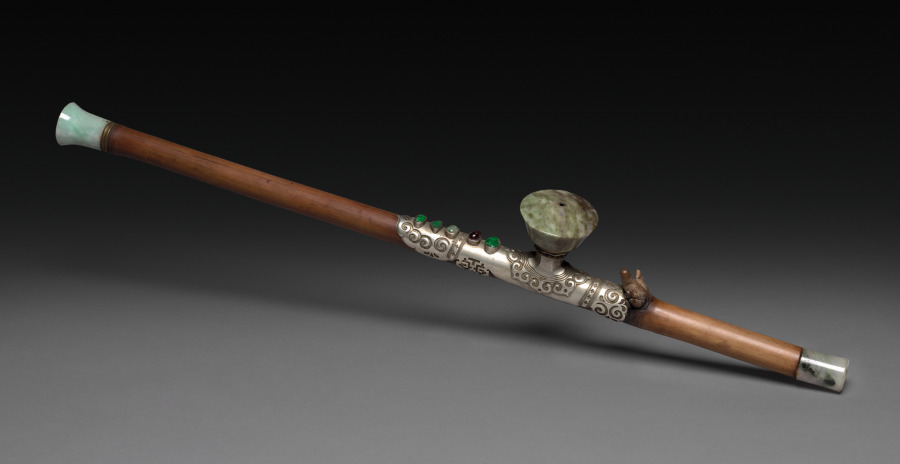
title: Opium Pipe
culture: China, Qing dynasty (1644-1911)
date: 1800s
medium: wood, jade and silver decoration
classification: Miscellaneous